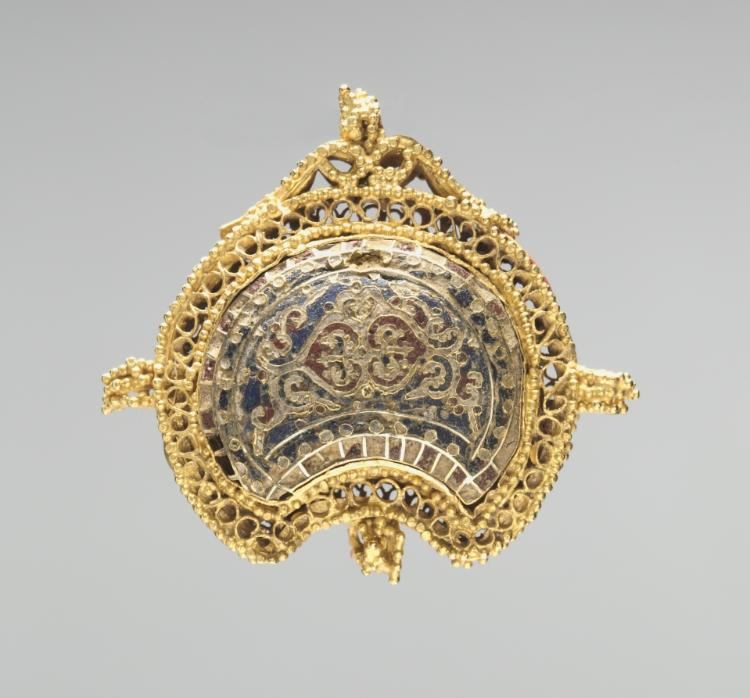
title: Crescent-Shaped Pendant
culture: Byzantium, Constantinople?, Byzantine period, 11th century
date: 1000–1100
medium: gold filigree with cloisonné enamel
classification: Jewelry